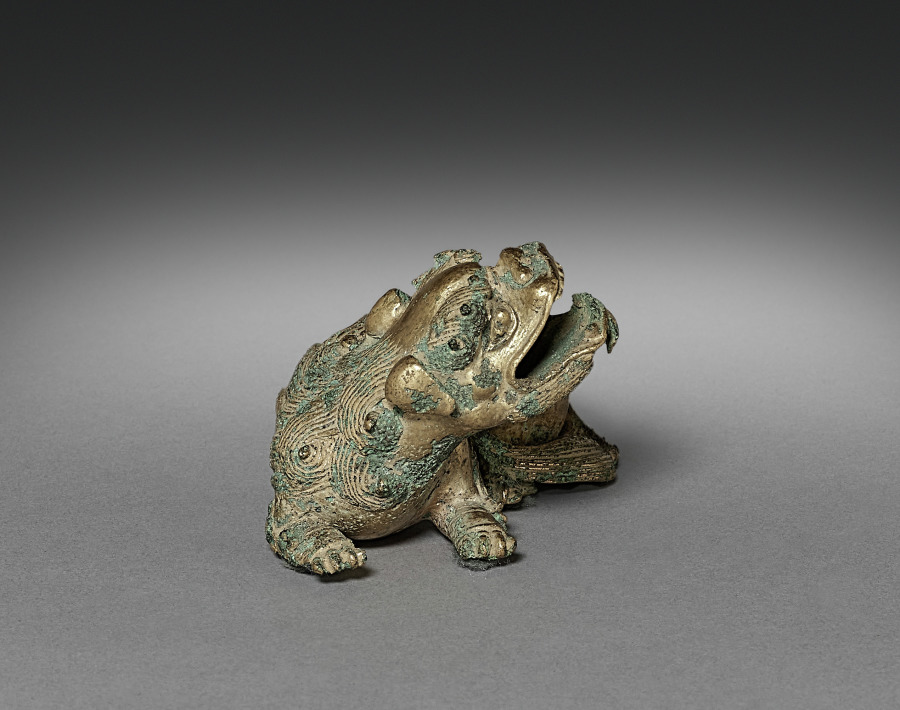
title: Dog-shaped Paperweight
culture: Korea, Unified Silla period (676-935)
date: 676–935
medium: gilt bronze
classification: Sculpture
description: This small object in the shape of a hybrid dog-lion is believed to have been used as a paperweight. Since the Three Kingdoms period (57 BC−668), mercury amalgam gilding had been widely employed to embellish metal objects as well as to make their surface resistant to acids. This technique involves mixing pure gold powder with liquid mercury to form a paste-like mixture. As heat is applied, the mercury evaporates, but an opaque layer of gold remains on the surface. This coating must be polished by first rubbing it with dried rice seedlings, then processing it in ash lye to eliminate impurities; next, the piece is washed and rinsed in a plum vinegar bath.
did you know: This is a dog and lion hybrid.